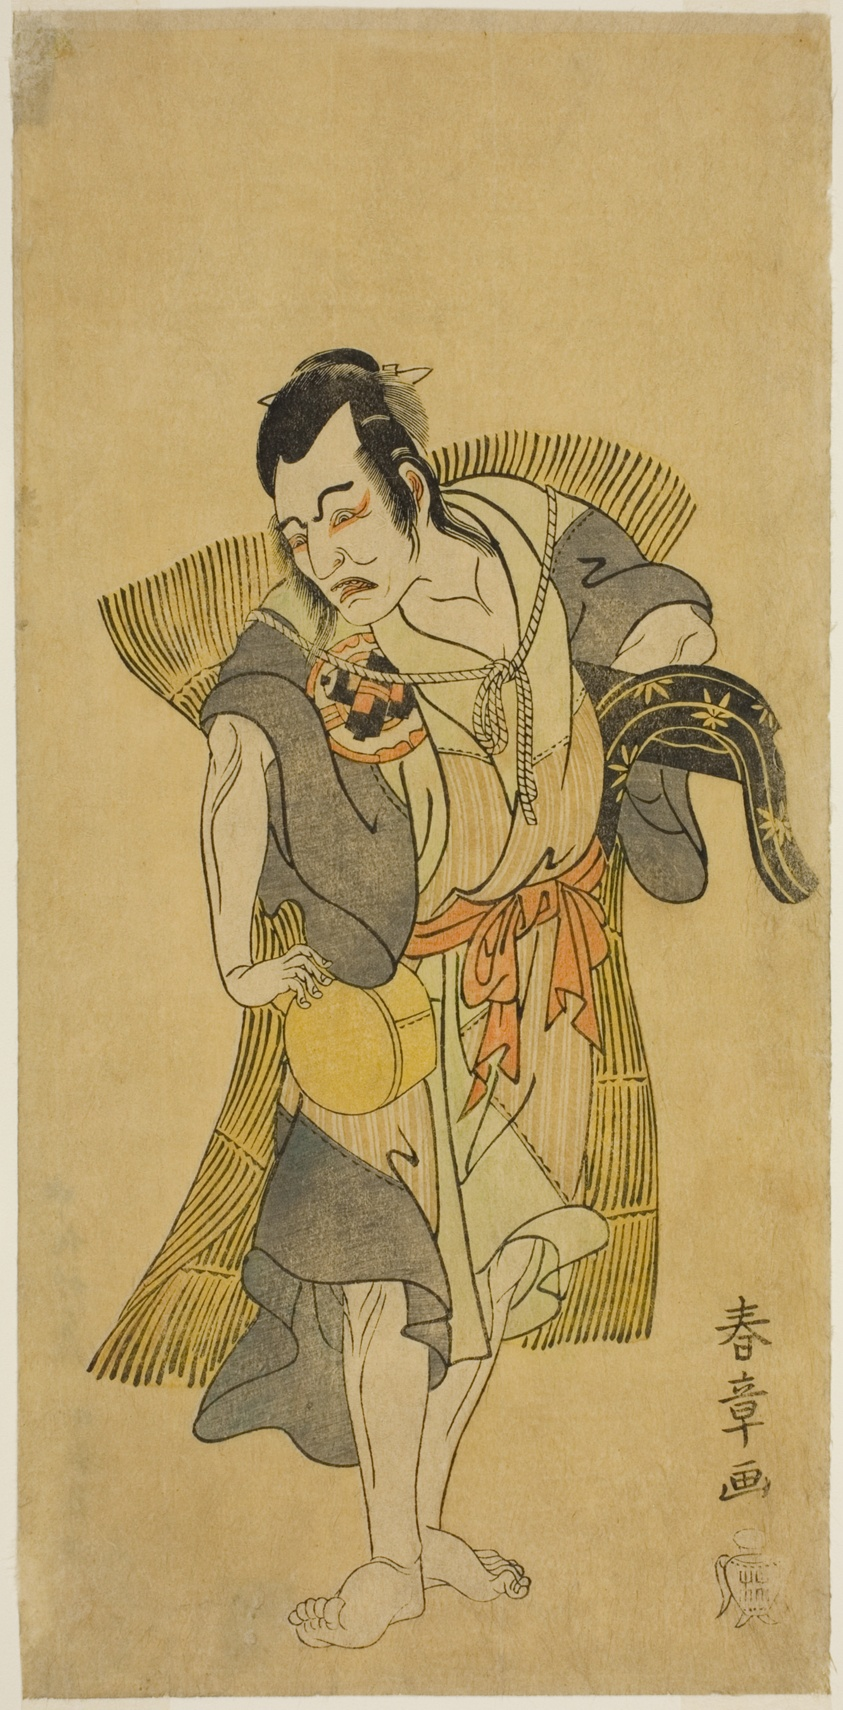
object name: Print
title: The Actor Nakamura Utaemon I as Kudo Suketsune Disguised as a Beggar in the Play Soga Moyo Aigo no Wakamatsu, Performed at the Nakamura Theater in the First Month, 1769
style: Japanese (culture or style)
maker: Katsukawa Shunsho 勝川 春章; Japanese, 1726-1792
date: c. 1769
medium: Color woodblock print; hosoban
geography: Japan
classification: woodblock print; print; asian art